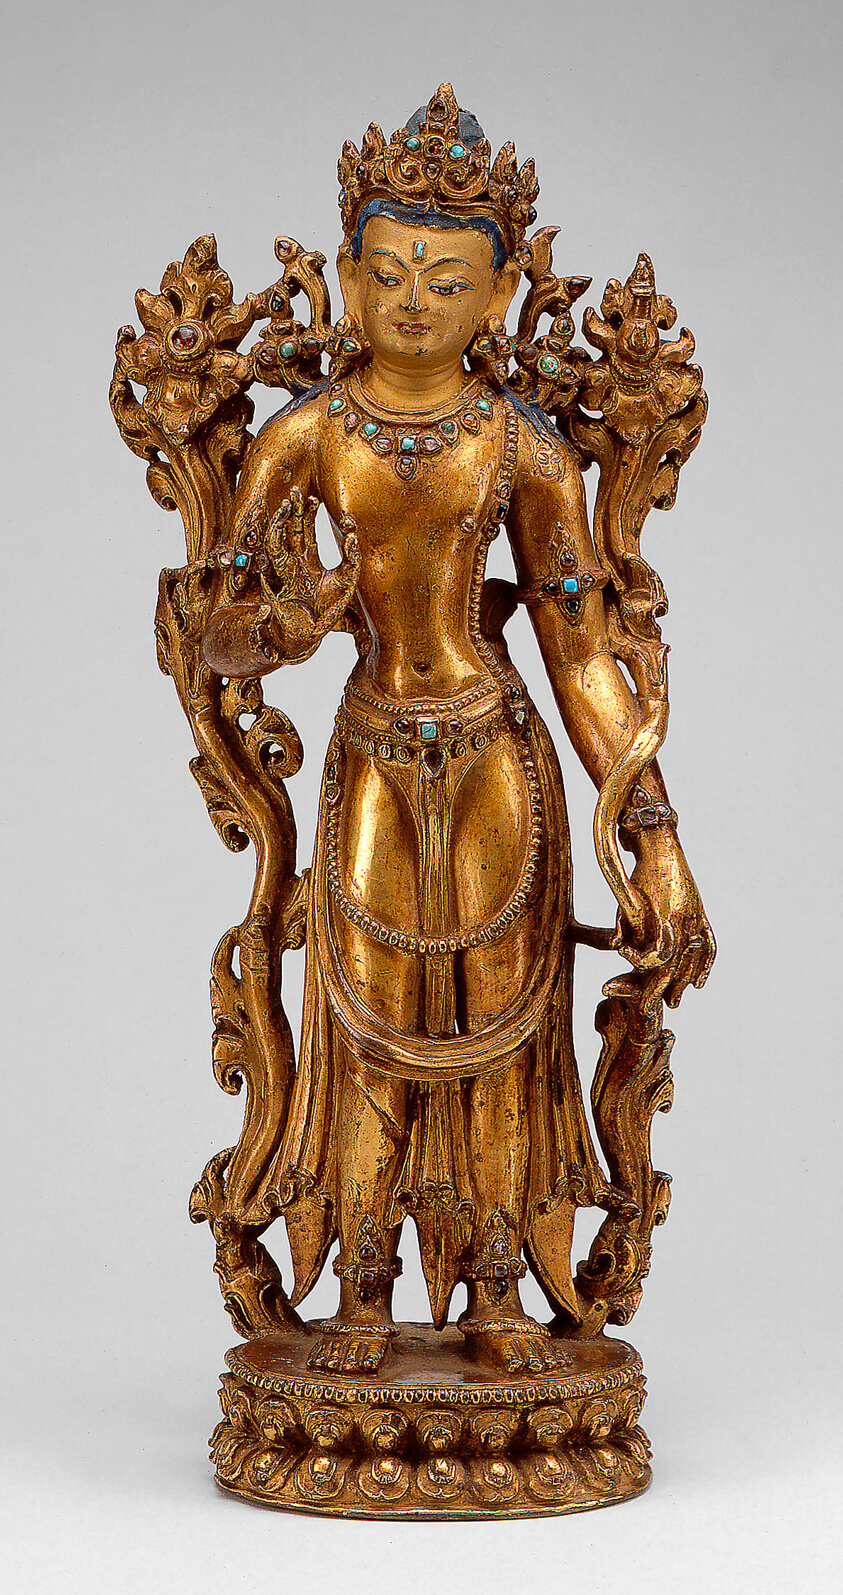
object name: Sculpture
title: Bodhisattva Maitreya with Fear-Not Gesture (Abhayamudra)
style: Himalayan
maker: Tibet; Southern Tibet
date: 15th century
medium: Gilt bronze with blue pigment and gemstones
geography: Southern Tibet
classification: bronze; metal; sculpture; asian art